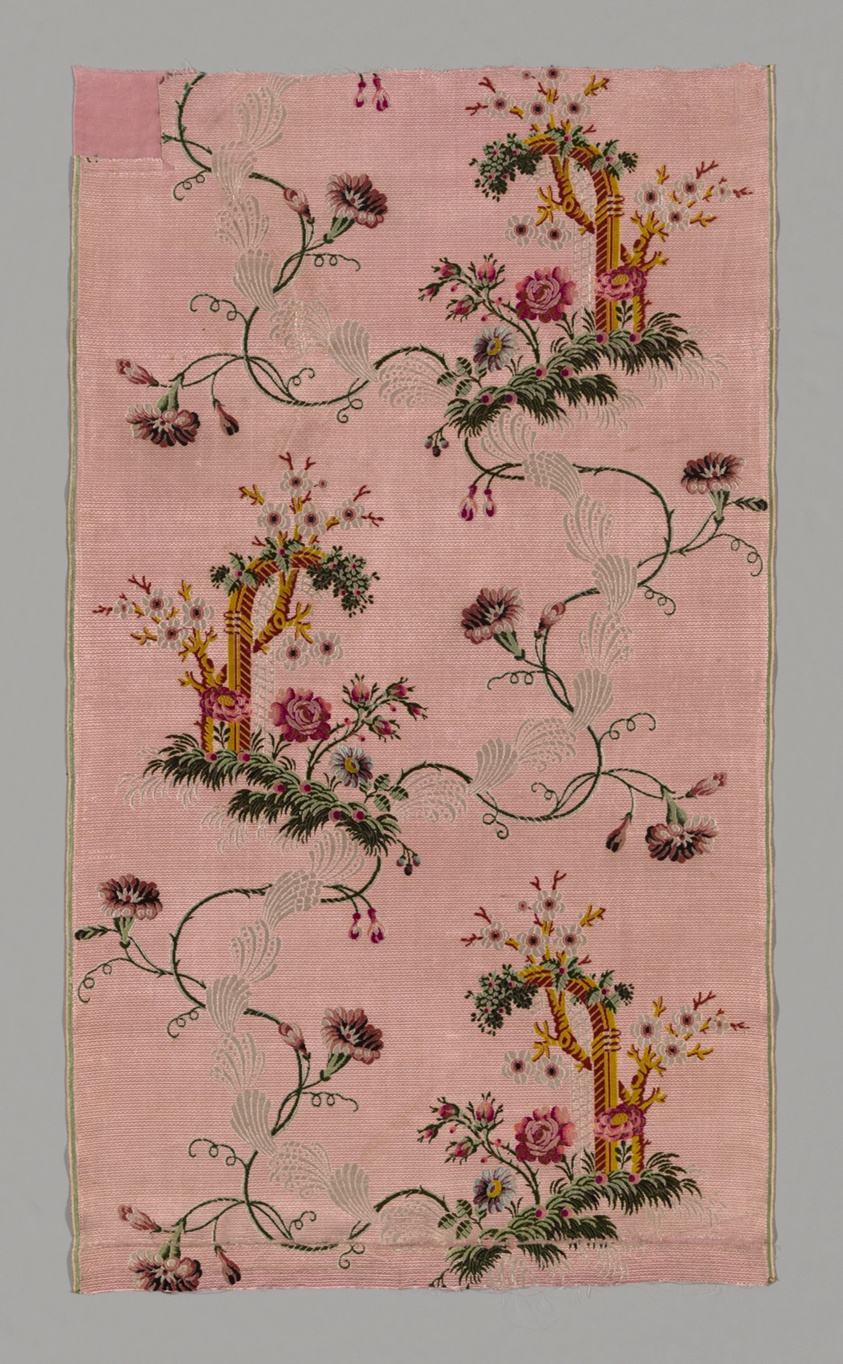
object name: Textile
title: Panel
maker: England, Spitalfields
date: Mid–1740s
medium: Silk, plain weave with patterning warps and patterning and brocading wefts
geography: Spitalfields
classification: textile; weaving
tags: Floating Gardens